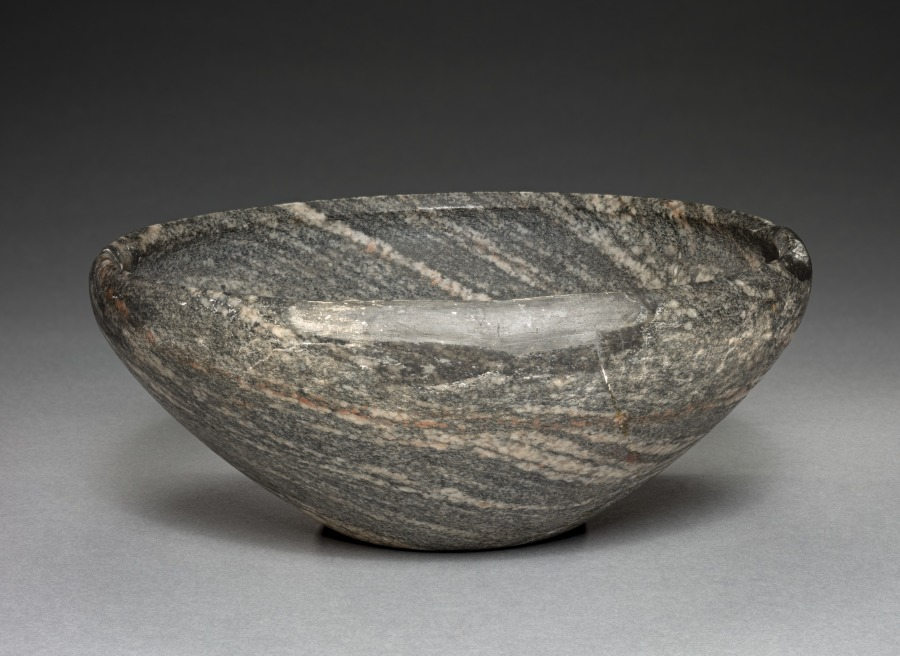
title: Bowl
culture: Egypt, Early Dynastic (2950–2647 BCE), Dynasty 2, reign of Nynetjer (c. 2700 BCE) or later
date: 2770–2647 BCE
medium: anorthosite gneiss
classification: Vessels